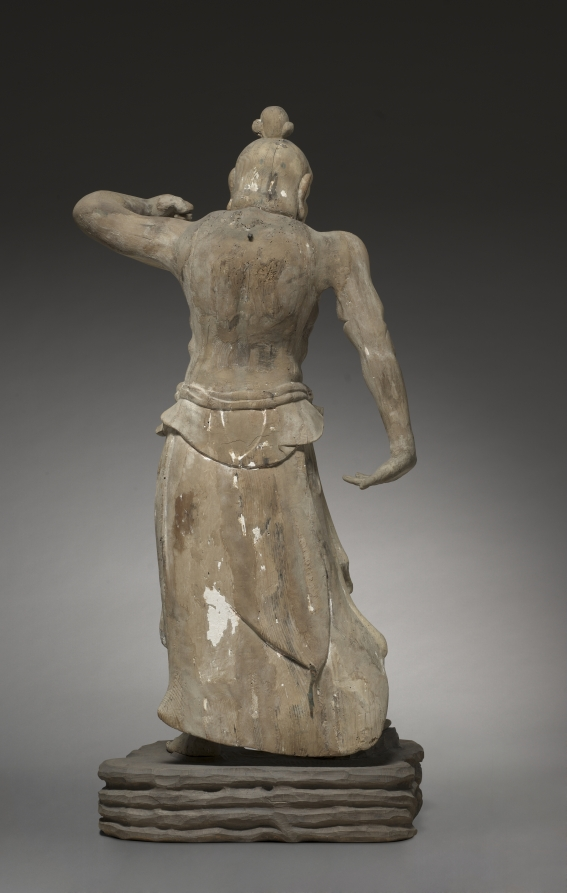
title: Guardian Figure: Nio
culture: Japan, Kamakura period (1185–1333)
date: 1200s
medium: chestnut and cypress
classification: Sculpture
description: Paired with a closed-mouth Nio, this figure originally protected the entrance of a Buddhist temple in Japan. Sculpted in an expressive, dynamic style, this figure was created using several pieces of wood carefully joined together. This imposing figure was originally painted, though is substantially faded due to weathering. The carved wooden bases for the two guardian figures on display are modern replacements.